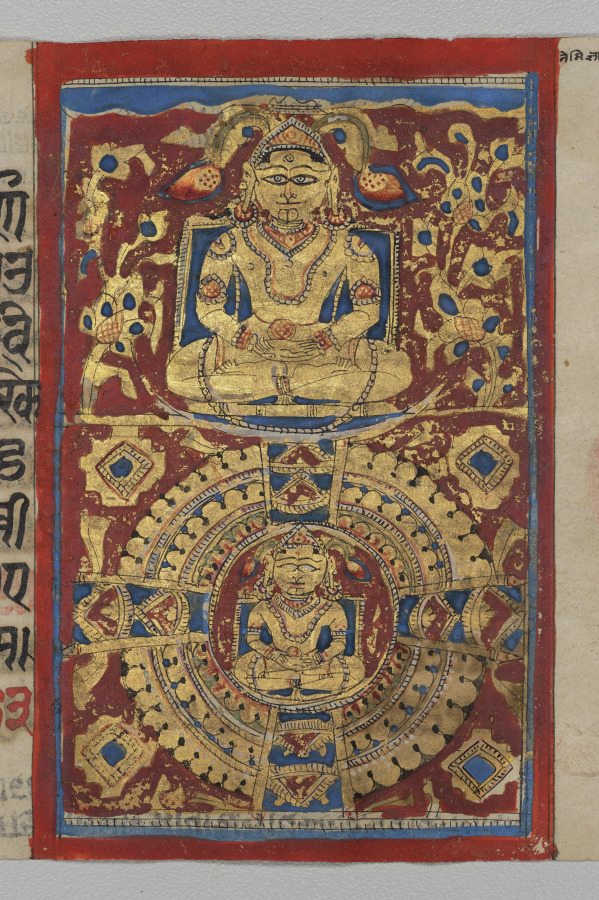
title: Nemi's Omniscience and First Teaching (below) and Nemi in the Realm of Liberation (above), Folio 51 (recto), from a Kalpa-sutra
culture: Western India, Gujarat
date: c. 1475–1500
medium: Gum tempera, ink, and gold on paper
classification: Painting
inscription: [[upper right]] Nemi jñāna nirvāṇa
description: Nemi, who was the cousin of the Hindu god Krishna, lived in the ancient mythic past. Like every other Jina, after achieving enlightenment he gave a mystical teaching to all the gods and animals and appeared to the assembly simultaneously in all directions. This exposition of Jain teachings is depicted by the circular diagram with Nemi seated in the center. The crescent moon under the seated figure of Nemi at the top of the page reveals that he is depicted in the realm of liberation, above the world of birth and death, in eternal meditative bliss.